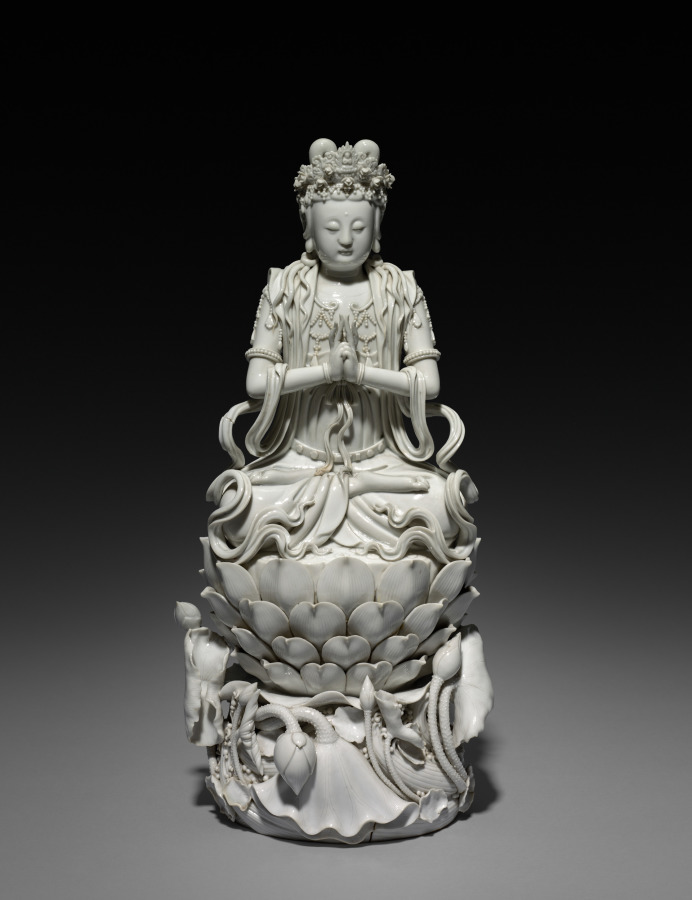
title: Bodhisattva Guanyin of the South Sea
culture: China, Fujian Province, Ming dynasty (1368-1644) - Qing dynasty (1644-1911)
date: 1600s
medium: Porcelain with white glaze, Dehua ware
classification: Ceramic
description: Guanyin, the Buddhist bodhisattva of infinite compassion (Avalokiteshvara in Sanskrit), is the most revered enlightened being in East Asia. The bodhisattva perceives all beings in need of help and reveals himself in many forms. Here, his elaborate lotus pedestal rests on the crest of surging waves, identifying him as Guanyin of the South Seas. The Dehua kilns in Fujian province in southern China produced white porcelain figures for both the domestic and export markets. In China, such a figure may have furnished a house altar or a temple.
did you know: When Marco Polo visited China in the late 1200s, he was so impressed by the Dehua kilns that he included lengthy descriptions of ceramic production in his chronicle of his journey.